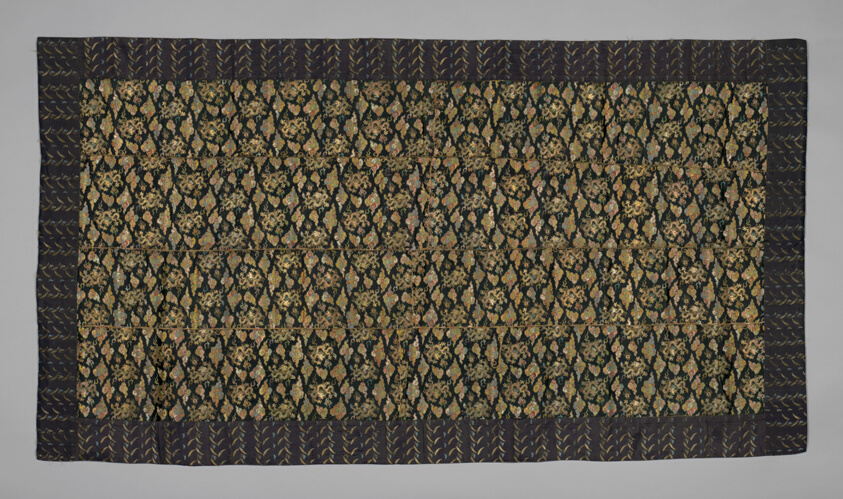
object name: Textile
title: Kesa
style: edo (japanese period), meiji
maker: Japan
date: Edo period (1615–1868)/ Meiji period (1868–1912), late 18th/early 19th century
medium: Priest robe (kesa)? larger than usual and made in strips set together by conching in gold thread in scrolls. Of kinran fancy compound satin of silk and gilded paper strips cut very finely. Design in blue, red, green, brown, yellow and white on a dark blue ground, r epresents five-clawed dragons, flaming yewels and floating clouds. It is bordered with blue brocaded silk with leaf and flower design; lined with heavy cotton. Priest robe (kesa)? Larger than usual and made in strips set together by conching in gold thread in scrolls. Of kinran fancy compound satin of silk and gilded paper strips cut very finely. Design in blue, red, green, brown, yellow and white on a dark blue ground, r epresents five-clawed dragons, flaming jewels and floating clouds. It is bordered with blue brocaded silk with leaf and flower design and lined with heavy cotton.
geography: Japan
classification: textile; weaving